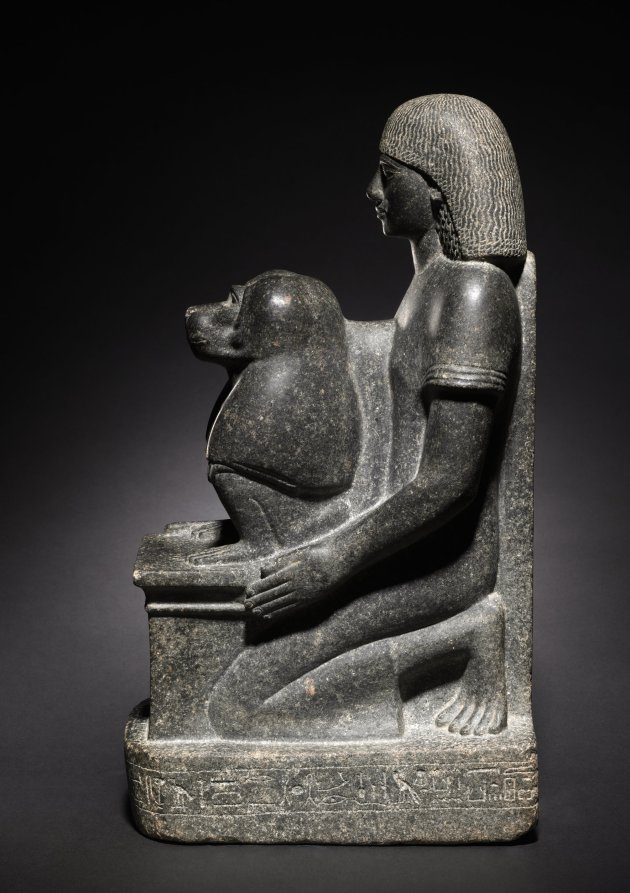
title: Statue of Minemheb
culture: Egypt, New Kingdom (1540–1069 BCE), Dynasty 18, reign of Amenhotep III (1390–1352 BCE)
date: c. 1391–1353 BCE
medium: granodiorite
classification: Sculpture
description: Minemheb was one of the many court officials who helped prepare for Amenhotep III's 30-year jubilee festival. Clearly, Minemheb regarded this as the high point of his career, since his title as chief of construction for the jubilee temple is the primary one provided on this statue. It is actually a statue within a statue: Minemheb kneels to present a small altar, upon which squats a statue of the god Thoth in baboon form. Carved in extremely hard stone, Minemheb's statue is nonetheless carefully detailed and superbly modeled. Special attention was given to the rendering of the baboon's face. The heavy-lidded eyes and furrowed brow give the animal an almost contemplative expression.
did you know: The baboon in this sculpture is the god Thoth in one of his animal forms.